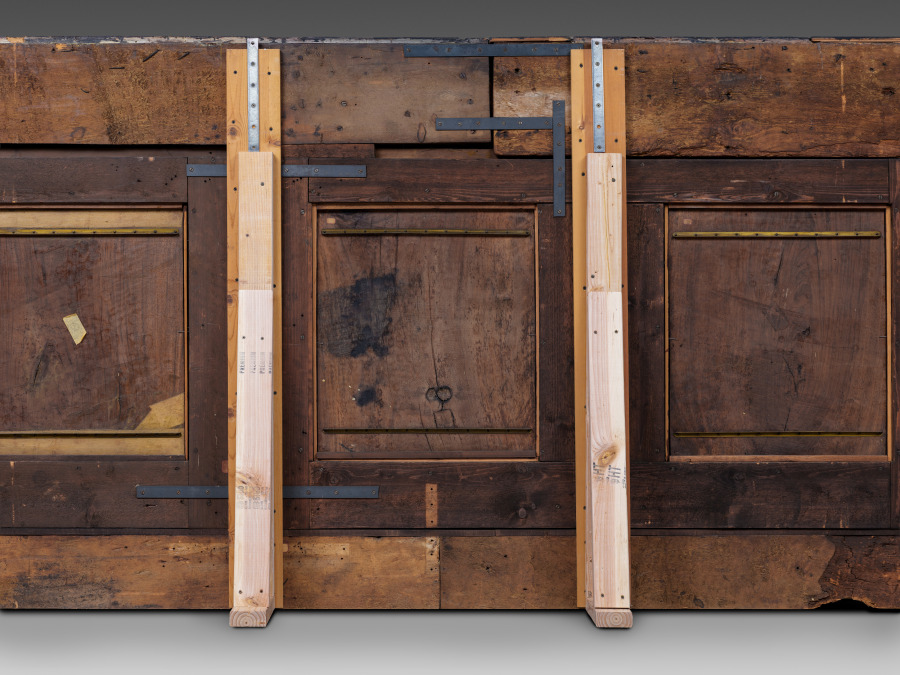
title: Upper Paneling from a Sacristy Armoire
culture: Italy, Florence, late 15th century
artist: attributed to Giuliano da Maiano (Italian, 1432–1490)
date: c. 1460–1475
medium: walnut, inlaid with holly and ebony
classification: Furniture and woodwork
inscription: in four of the five panels is the Medici badge of a jeweled ring wound with a ribbon or bannerole, on which is inscribed the motto "Semper." The frieze in the cornice contains part of a quotation from the Vulgate, Paul's epistle to the Romans, Chapter XI.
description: The imagery on the inset panels is the result of a technique known as intarsia, the skilled inlaying of woods of different colors to create a type of mosaic, popular during the 15th and 16th centuries in Italy for the decoration of paneling and furniture for studies, small rooms, and church sacristies. This large set of five intarsia panels comes from an unknown Florentine church. In its original setting the panels rested upon a row of similarly decorated cupboards (a sacristy armoire) which were used for the storage of liturgical vestments and books. This panel would have therefore been seen at eye level. The central panel depicts the Resurrection of Christ. The two outside panels depict the emblem of Lorenzo de Medici-three plumes encircled by a jeweled ring above a scrolling ribbon containing the Latin word SEMPER (Always). Lorenzo de Medici (1449-92) was the ruler of Florence when this sacristy armoire was constructed and was the likely patron. It seems to be the work of Giuliano da Maiano, an architect and intarsia-maker also responsible for the intarsia in the sacristy of Florence Cathedral.